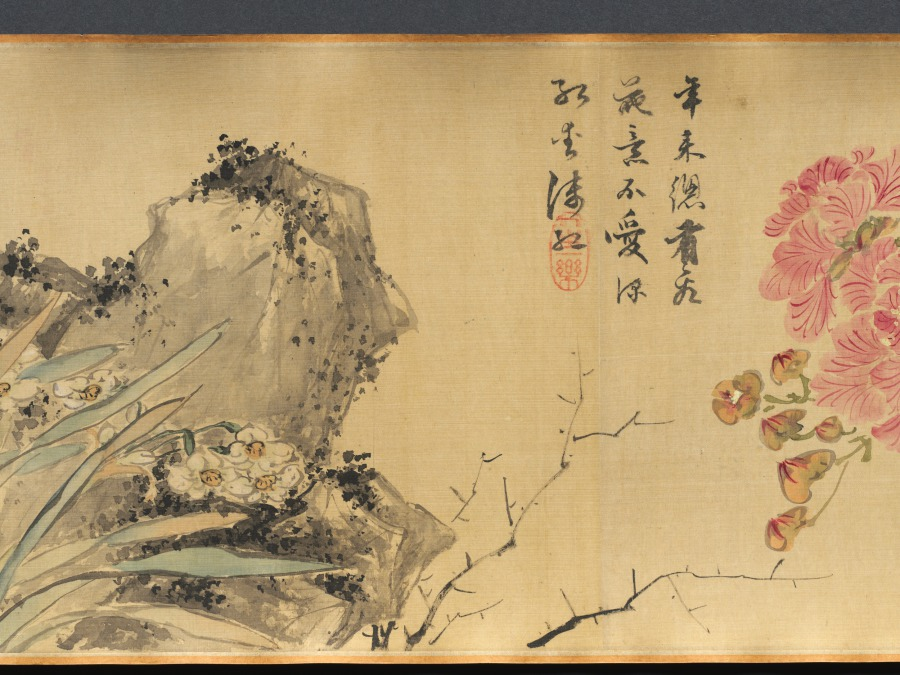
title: Flowers of Four Seasons, with Poems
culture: China, Ming dynasty (1368–1644)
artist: Wang Guxiang (Chinese, 1501–1568)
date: 1531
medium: handscroll; ink and light color on silk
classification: Painting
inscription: Artist's inscription, signature, and 15 seals. Ink Orchids. Sewn as pendants for the man of worth, swaying quiety, fragrance in the valley. [seal] Hsiao-chu ts'un Peony. Wiping his face, the young gentleman Ho [Ho Yen of Wei, Three Kingdoms] appears to have been powdered. His previous life was the perfume-stealing Han Shou [of Chin, 265–419 CE], the fragrance still lingers. [seal] Ts'un-wu chai. Flowering Crab Apple, New Bamboo. Shao-lin [Du Fu, 712–770] had to put down his brush. [Flowering Crab Apple]. Yü-k'o [Wen T'ung, d. 1079) in vain wrote poems about [Bamboo]. [seal] Yu-shih. Lotus Flowers. When she turns her head, half-hidden by a fan, and casts a glance, all the beautiful women become colorless. [seal] K'ang yüeh huai. Loquat. Ripeness in summer. [seal] Lu-chih. Pomegranate Flower. Whenever I remember you I will send my thoughts, but where have you gone--the [skirt] of pomegranate red? [seal] Wu-ho Sheng. Day Lily. Plant the day lily to forget sorrow. [seal] Yu-shih. Chrysanthemum. The untrammelled joy at the eastern fence. [seal] Lu-chih. Begonia. Comparing it to the beauties of Spring, and spreading them out as trimming for the stone steps. [seal] Yu-shih. Hibiscus. In recent years I have always enjoyed looking at flowers; instead of dark red I preferred pink ones. [seal] Jen-sheng i-lou. Narcissus, Camellia. The jade girdle left behind at Lo River. [Narcissus]. The precious pearls glitter before Spring. [Camellia]. [seal] Lu-chih. Heavenly Bamboo (Nandina domestica). A single branch in the wintry season. [seal] K'ang yüeh huai. Plum. Fragrant snow in the Lo-fou Mountains. [seal] Ts'un-wu chai. In the eleventh lunar month of the hsin-mao year of the Jiaqing era [1531], [I] imitated the boneless style of Yüan masters in sketching from life. Guxiang [seals] Yu-shih; Lu-chih. Translated by Wai-kam Ho/Lingyun Shih Liu (1980)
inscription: 2 colophons and 23 additional seals: 1 colophon dated 1632, and 2 seals of Li Jih-hua [Li Rihua] 李日華 (1565–1635); 1 colophon and 2 seals of Xiang Shengmo 項聖謨 (1597–1658); 3 seals of Liang Qingbiao 梁清標 (1620–1691); 6 seals of the Jiaqing 嘉慶 emperor (r. 1796–1820); 9 seals of Ch'eng Ch'i [Cheng Qi] 程琦 (1911–1988)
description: In this painting, flowers are loosely arranged by the seasons: narcissus and peony represent early spring; yellow loquat and lotus, summer; chrysanthemum, autumn; and the plum and evergreen bamboo, winter. The artist added to each flower a poetic line of calligraphy associating each plant with a historic or legendary figure. For example, the chrysanthemum, along with the line “The untrammeled joy at the eastern fence,” refers to the poet Tao Yuanming (died AD 427) who enjoyed chrysanthemums at the eastern fence in his garden. The scroll illustrates Wang Guxiang’s mastery of free brushwork, combining light monochrome ink with transparent colors. In his inscription, Wang says he used the “boneless” style without outlines as developed during the Yuan dynasty (1279–1368). Wang was a native of Changzhou, a city in southeast China known for its rich flora and fauna, and flower-and-bird painting tradition.